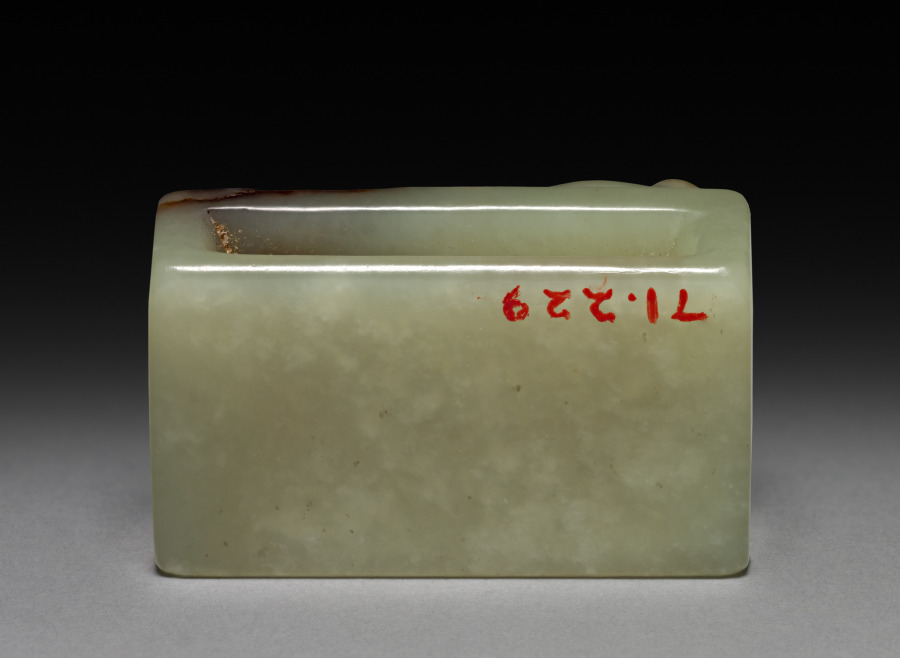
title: Scabbard Fitting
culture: China, Six Dynasties period (220–589 CE)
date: 317–581 CE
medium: jade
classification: Jade